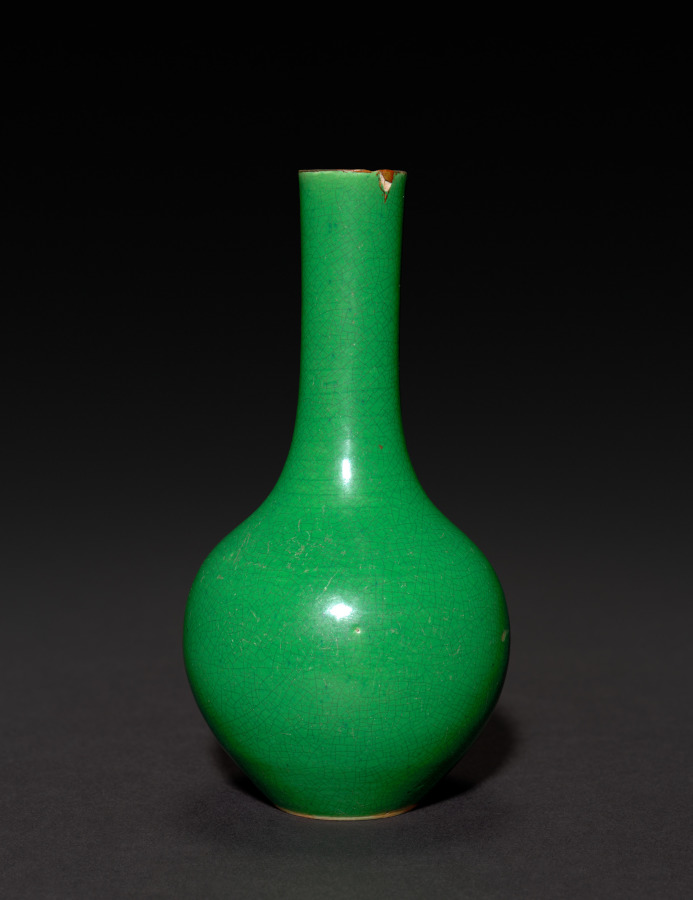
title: Bottle-Shaped Vase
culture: China, Qing dynasty (1644–1911), Qianlong reign (1736–95)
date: 1736–95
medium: porcelain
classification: Ceramic